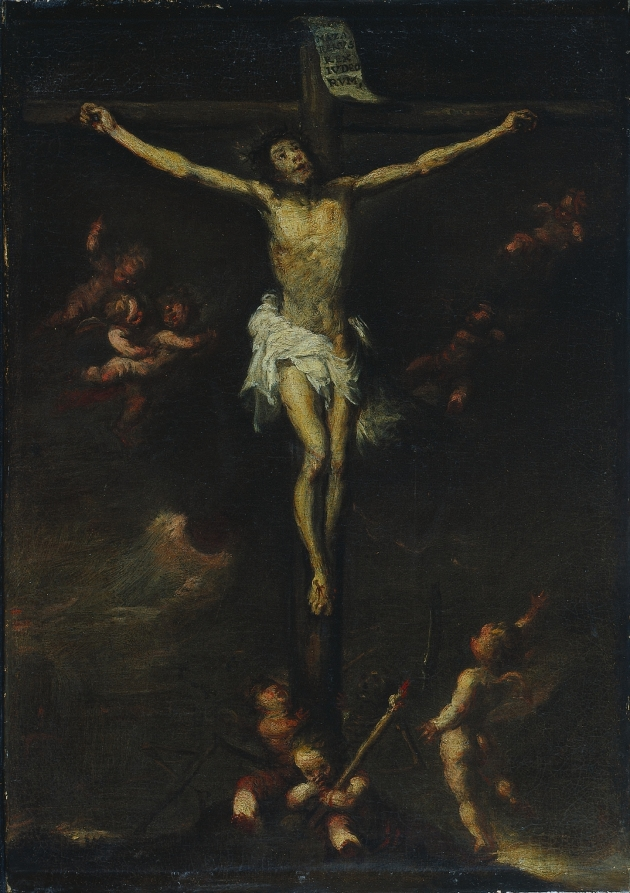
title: Crucifixion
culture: Spain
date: 1800s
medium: oil on canvas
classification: Painting